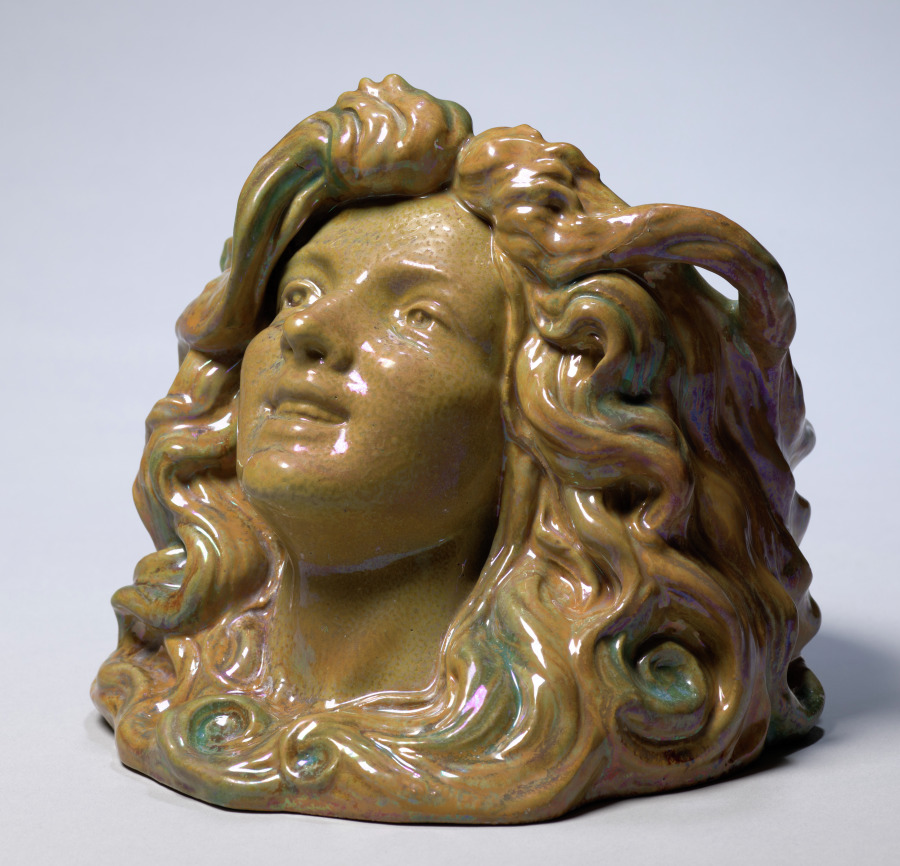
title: Vase in the Form of a Woman's Head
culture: France, late 19th Century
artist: Emile Muller (French, 1889)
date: c. 1895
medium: stoneware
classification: Ceramic